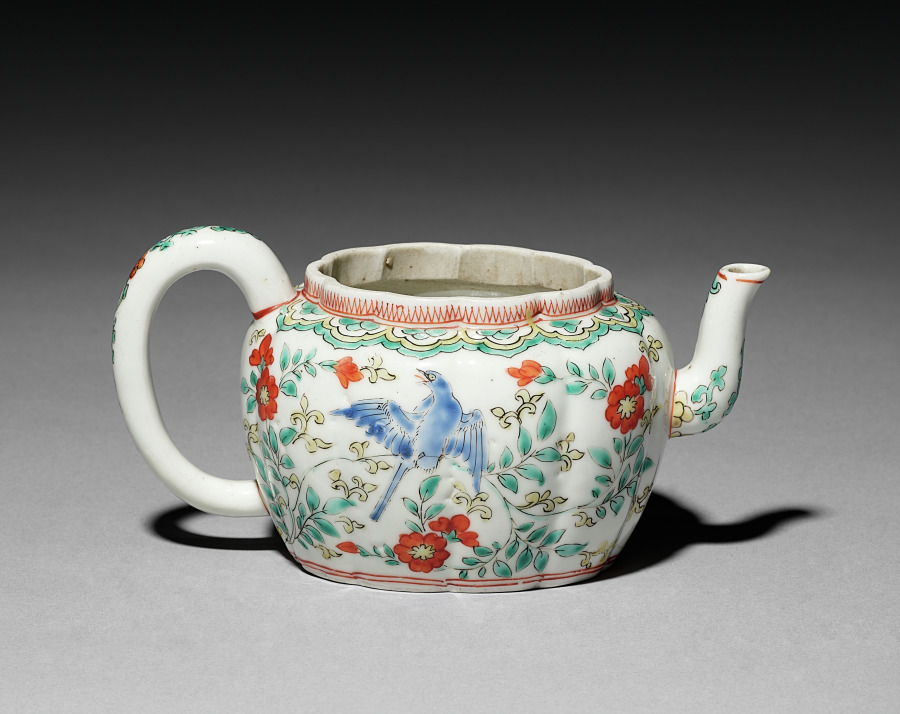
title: Teapot with Birds and Flowers (base)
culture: Japan, Edo period (1615–1868)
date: 1700s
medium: Porcelain with overglaze color enamel (Arita ware)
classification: Ceramic